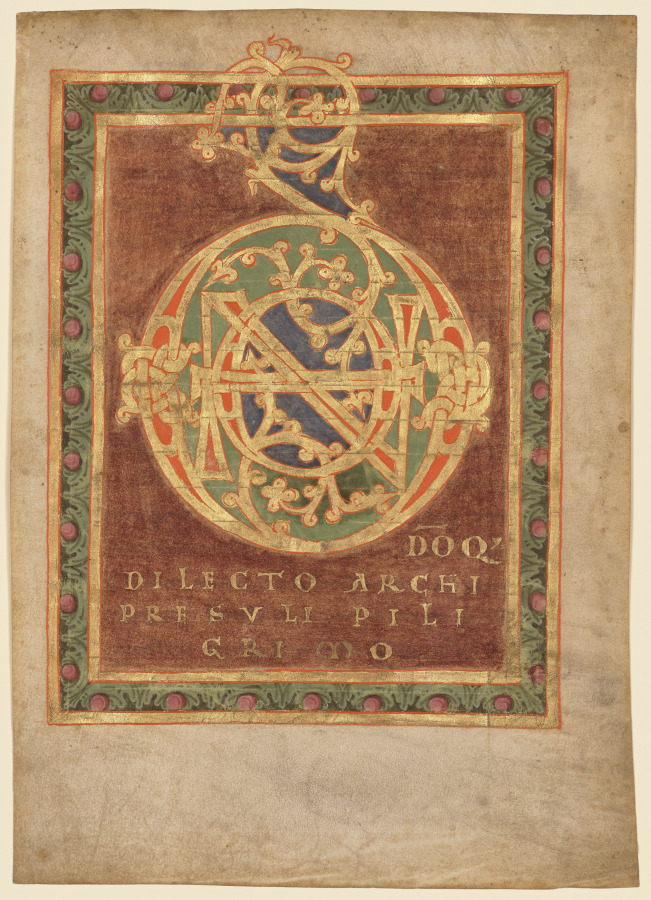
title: Title Page of Abbot Berno's "Tonarius:" Initial D[omino]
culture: Germany, Abbey of Reichenau, 11th century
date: c.1030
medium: ink, tempera, and gold on vellum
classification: Manuscript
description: This leaf originally served as the dedication page of the Tonarius, or Tonary, written by Reichenau's Abbot Berno (1008-1048). A tonary was a music manual used to regulate liturgical chants. Berno's manuscript was presented to Archbishop Pilgrim of Cologne (1021-1036) whose name appears at the bottom of this leaf.